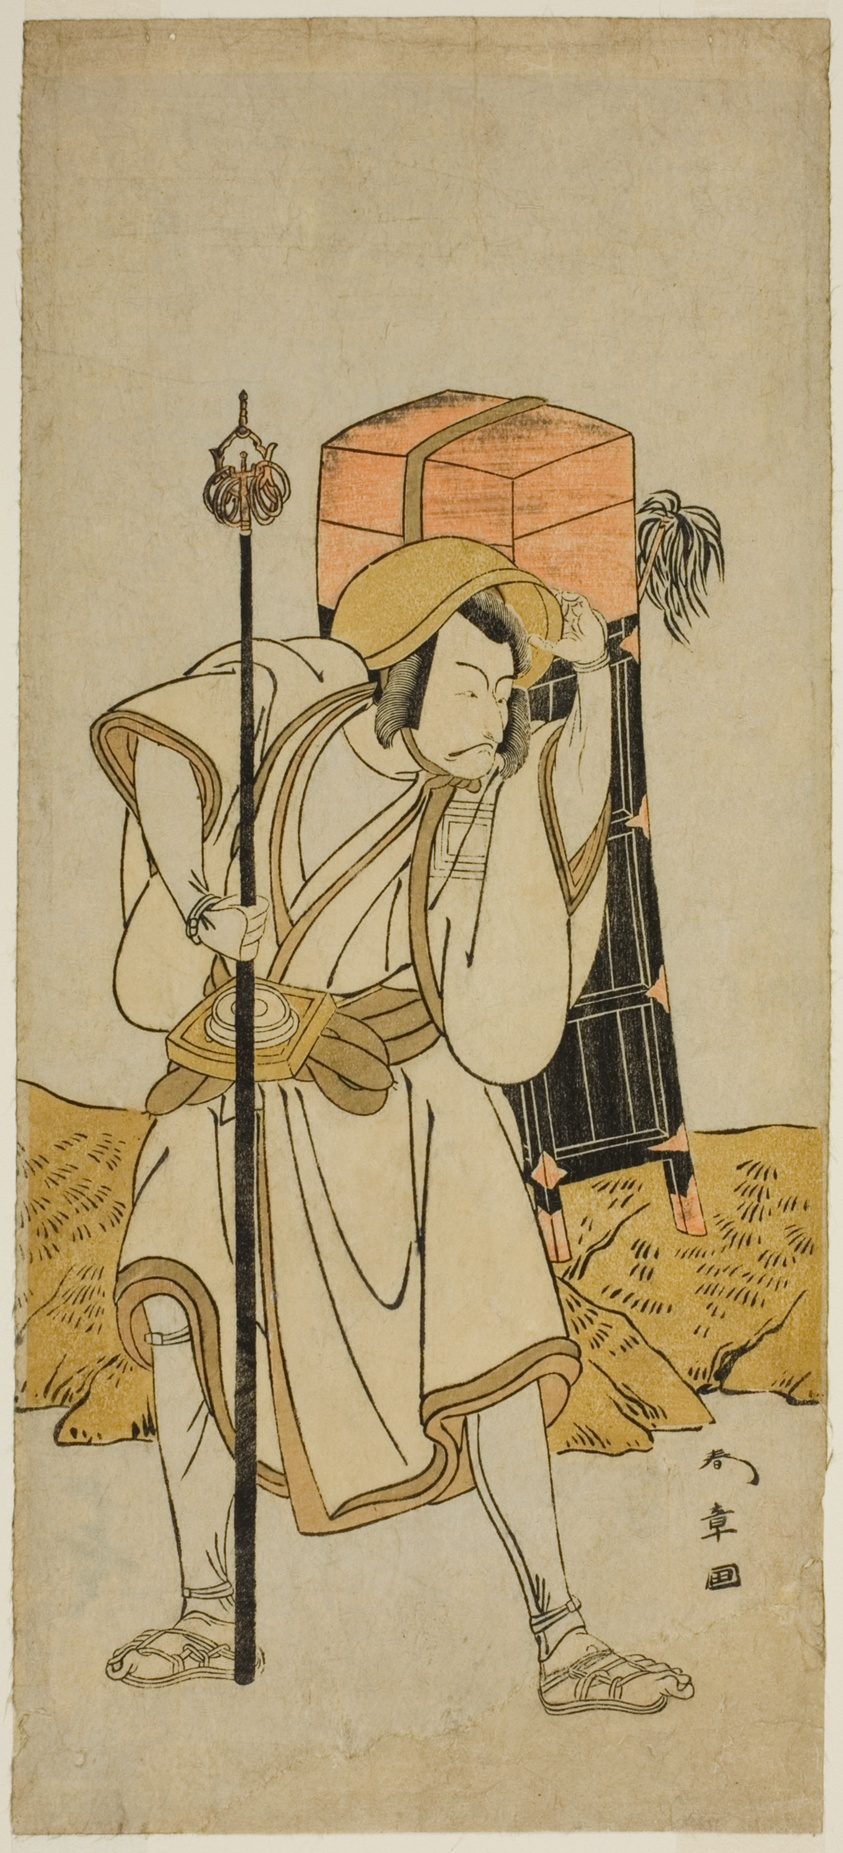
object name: Print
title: The Actor Ichikawa Danjuro V as Moriya no Daijin Disguised as Rokuju-rokubu in the Play Miya-bashira Iwao no Butai, Performed at the Morita Theater in the Seventh Month, 1773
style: Japanese (culture or style)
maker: Katsukawa Shunsho 勝川 春章; Japanese, 1726-1792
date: c. 1773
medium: Color woodblock print; hosoban; left sheet of diptych (?)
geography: Japan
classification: woodblock print; print; asian art